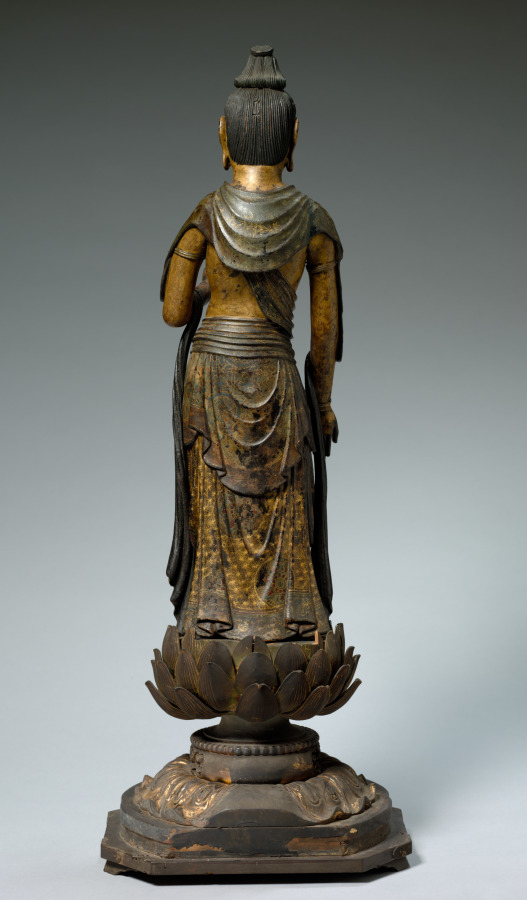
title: Bodhisattva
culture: Japan, Kamakura period (1185–1333)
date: c. 1200–1250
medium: lacquered wood with color, gilt copper, and cut-gold (kirikane)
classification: Sculpture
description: This sculpture represents one of two bodhisattvas who flank the Buddha Amida, the Buddha of Infinite Life and Light. He has one foot in front of the other and his right leg bent at the knee to show that he is in motion; his torso also sways. He accompanies Amida as he descends to collect a dying person who has asked to be born after death into Amida’s Pure Land, a place conducive to progressing along the path to enlightenment.